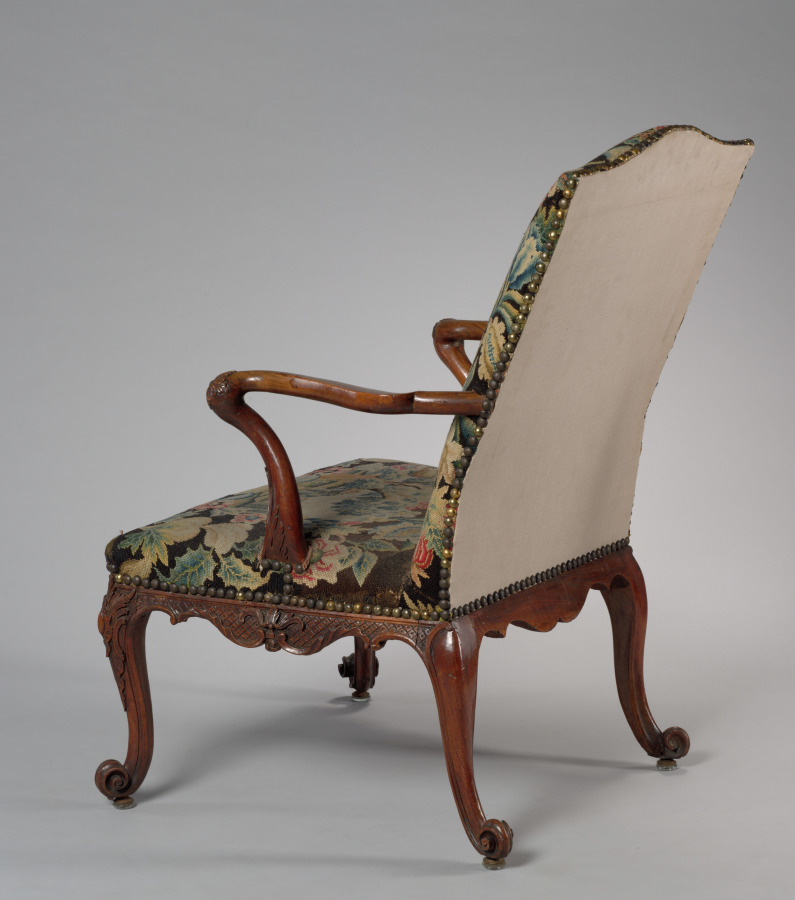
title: Armchair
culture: England, 18th century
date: 1760–1765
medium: mahogany upholstered in needlework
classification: Furniture and woodwork